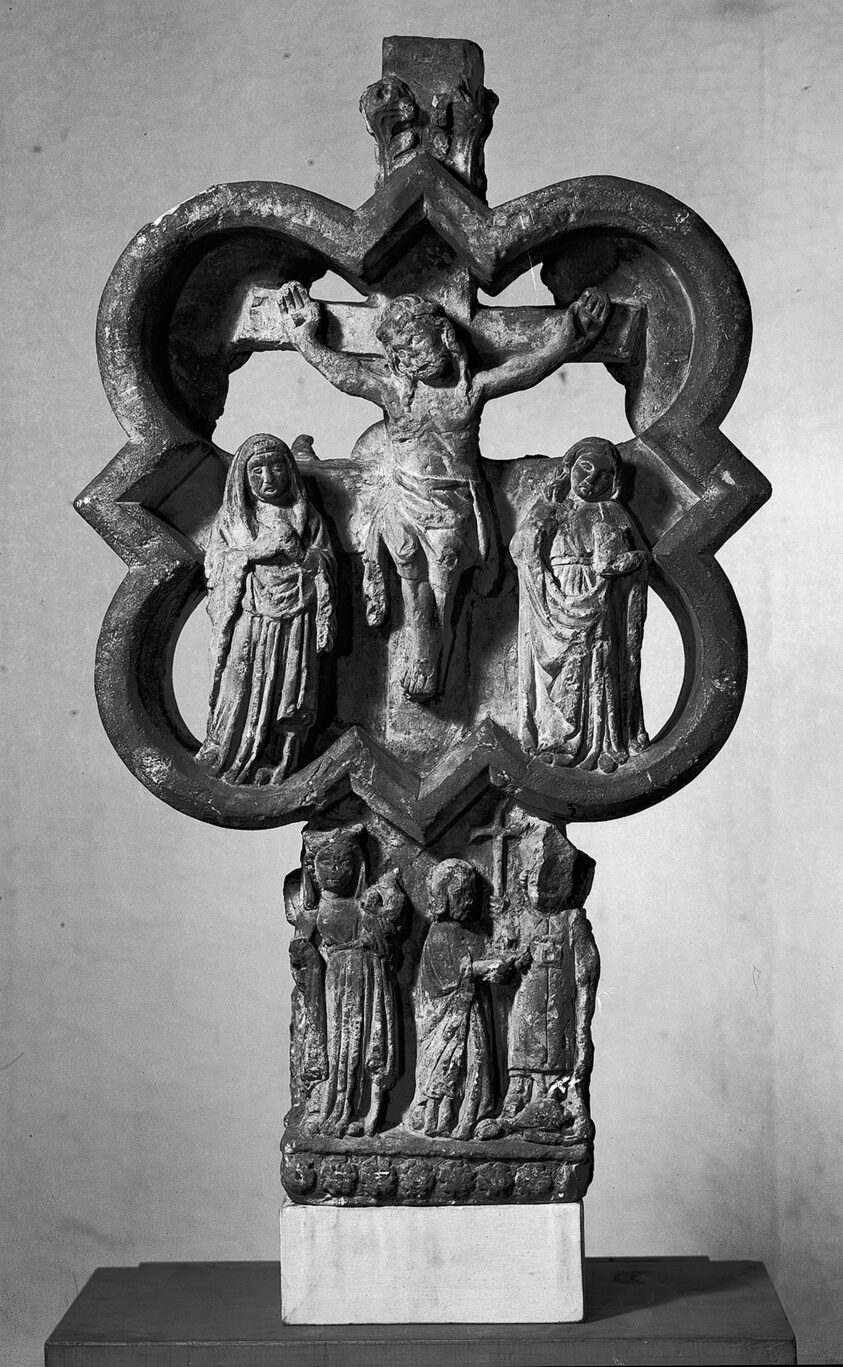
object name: Sculpture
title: Cross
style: medieval, 14th century, 15th century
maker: French; possibly Brittany or English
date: 1375/1425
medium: Limestone, traces of polychromy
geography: France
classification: limestone; large scale; sculpture; british; cross; crucifixion; french; sculpture/stone; stone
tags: cross, figures, women, men, Christian subjects, Christianity, crucifixions, Jesus, people, religion, religious, religious figures, religious scenes